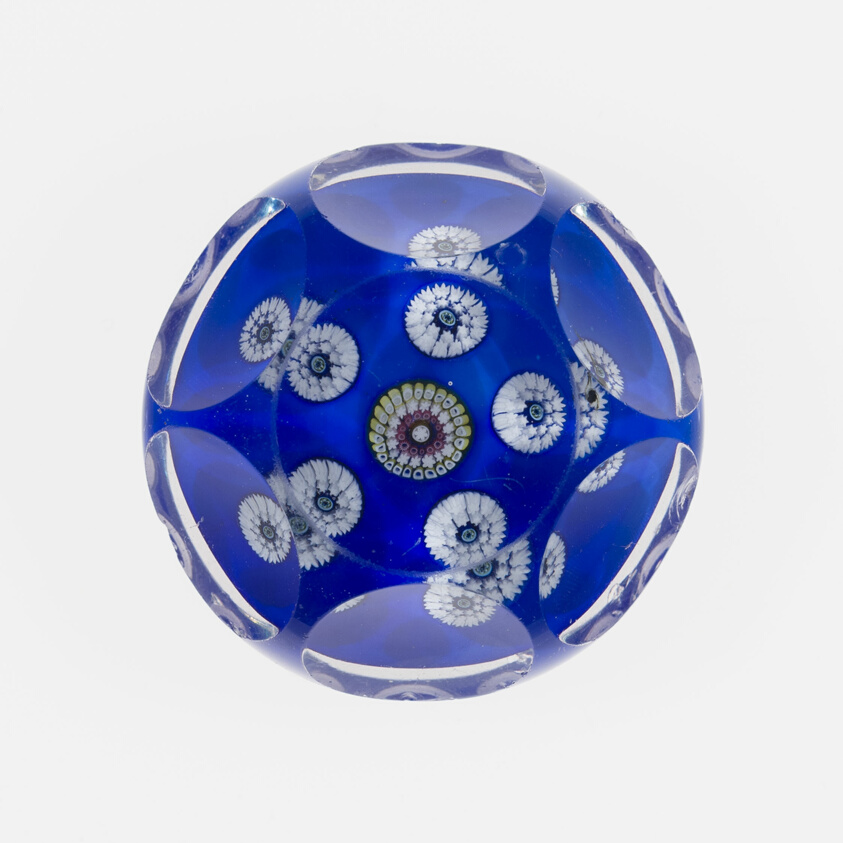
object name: Glass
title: Paperweight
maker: Saint-Louis Glassworks (Cristalleries de Saint-Louis); Lorraine, France, founded 1586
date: 19th century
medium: Glass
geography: Saint-Louis-lès-Bitche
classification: paperweight; millefiori; european decorative arts; glass